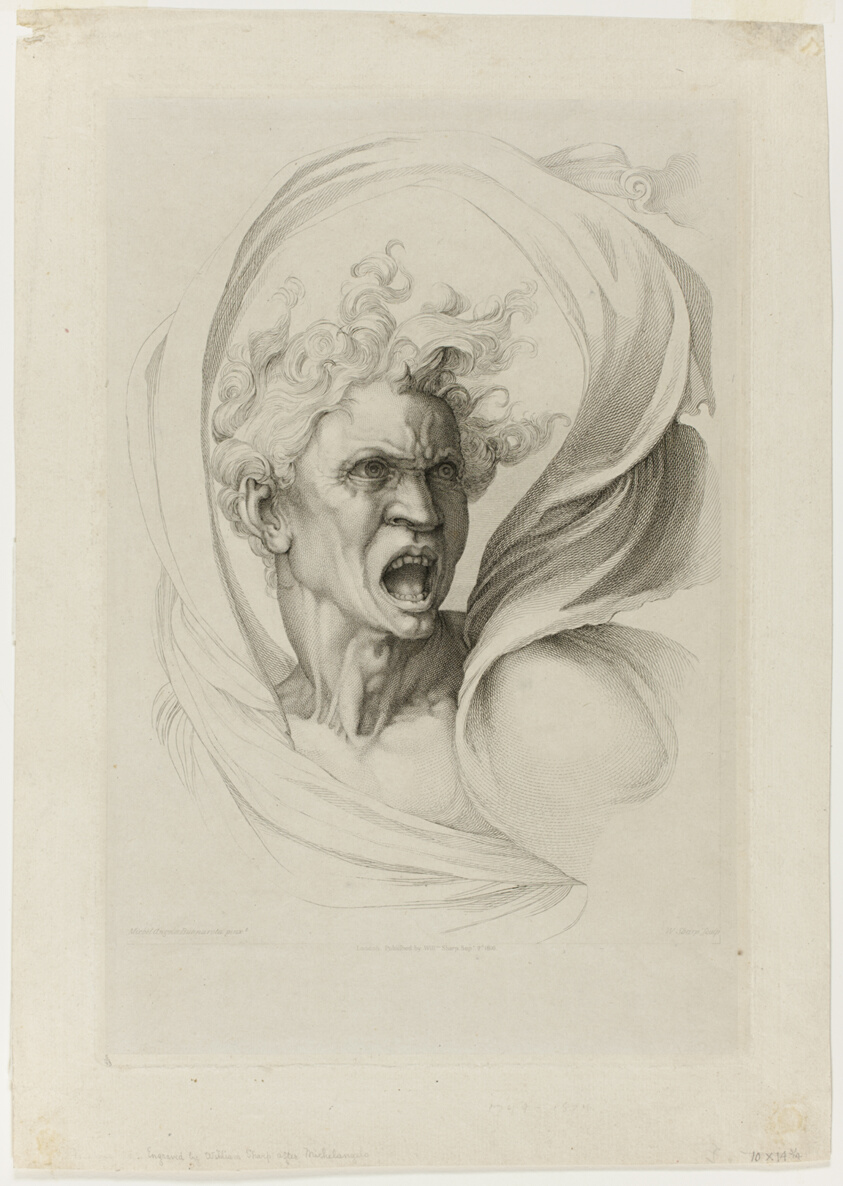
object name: Print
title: Evil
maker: William Sharp (English, 1748-1824); after Michelangelo Buonarroti (Italian, 1475-1564)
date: published September 2, 1816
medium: Engraving on ivory China paper, laid down on ivory laid paper (chine collé)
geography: England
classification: engraving; print; prints and drawing